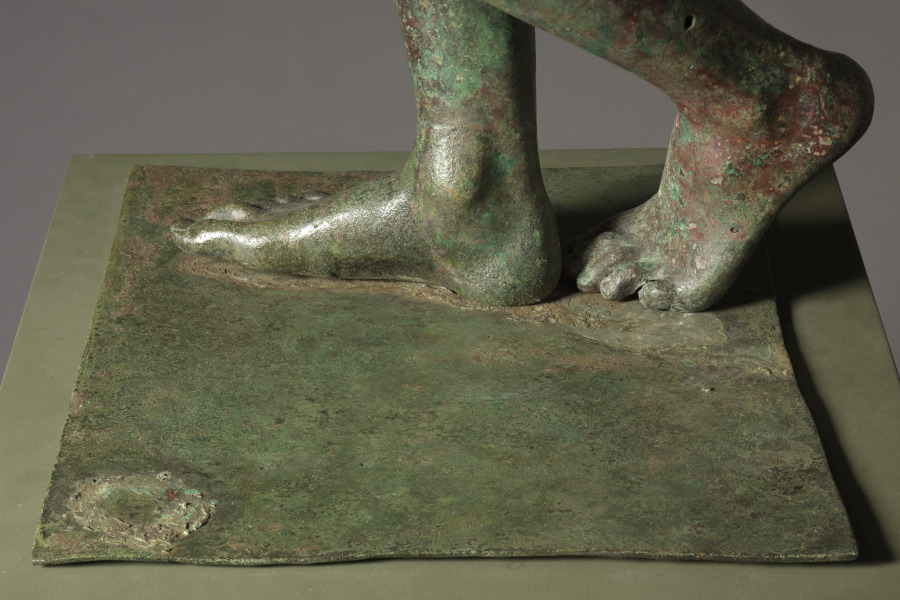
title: The Cleveland Apollo: Apollo Sauroktonos (Lizard-Slayer) or Apollo the Python-Slayer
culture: Greece, Athens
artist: attributed to Praxiteles (Greek, Athenian, c. 400–330 BCE)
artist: or Follower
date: c. 350–200 BCE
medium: bronze, copper and stone inlay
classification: Sculpture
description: The Cleveland Apollo was cast in multiple sections using the indirect lost-wax technique. First, molds were taken from a working model (now no longer known or preserved), which was then reproduced in hollow wax sections, each filled with a clay core. After details were added to the wax models, each was encased in clay. Then, the wax was heated, melted out, and replaced by molten bronze. Once cooled, the hollow bronze sections were fused together and finished, patching flaws and adding inlays and other details. Since the initial model was retained, it could be reused, allowing ancient sculptors to create multiples and variations of favorite works. Thus, remarkably, the Cleveland Apollo may once have been one of several such works. The consistently thin walls of the Cleveland Apollo (mostly 5-6 mm thick), together with the nearly invisible joins between most cast sections, show that it was created by highly skilled sculptors and foundry workers. Close looking reveals several noteworthy features. First, ovals atop the right foot mark a fusion weld, where molten bronze pooled to join separately cast sections. Second, small rectangular bronze patches cover parts of the surface (especially the right hip), each carefully cut and then hammered into place over holes or other casting defects. Inlaid lips, nipples, and eyes (the right ancient stone, the left now a modern replacement) added to the lifelike appearance of the sculpture, contrasting with the once bronze-colored skin. Finally, radiography helps to illuminate hidden features, such as the cast edge of the neck of Apollo.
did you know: Ovals across the top of the right foot show a clear join between separately cast sections.